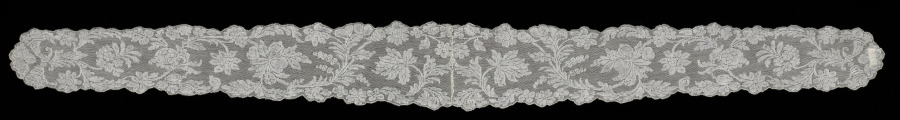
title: Pair of Lace Lappets (joined)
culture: France, Valenciennes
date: 1740–60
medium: Linen: bobbin lace (Valenciennes)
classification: Lace